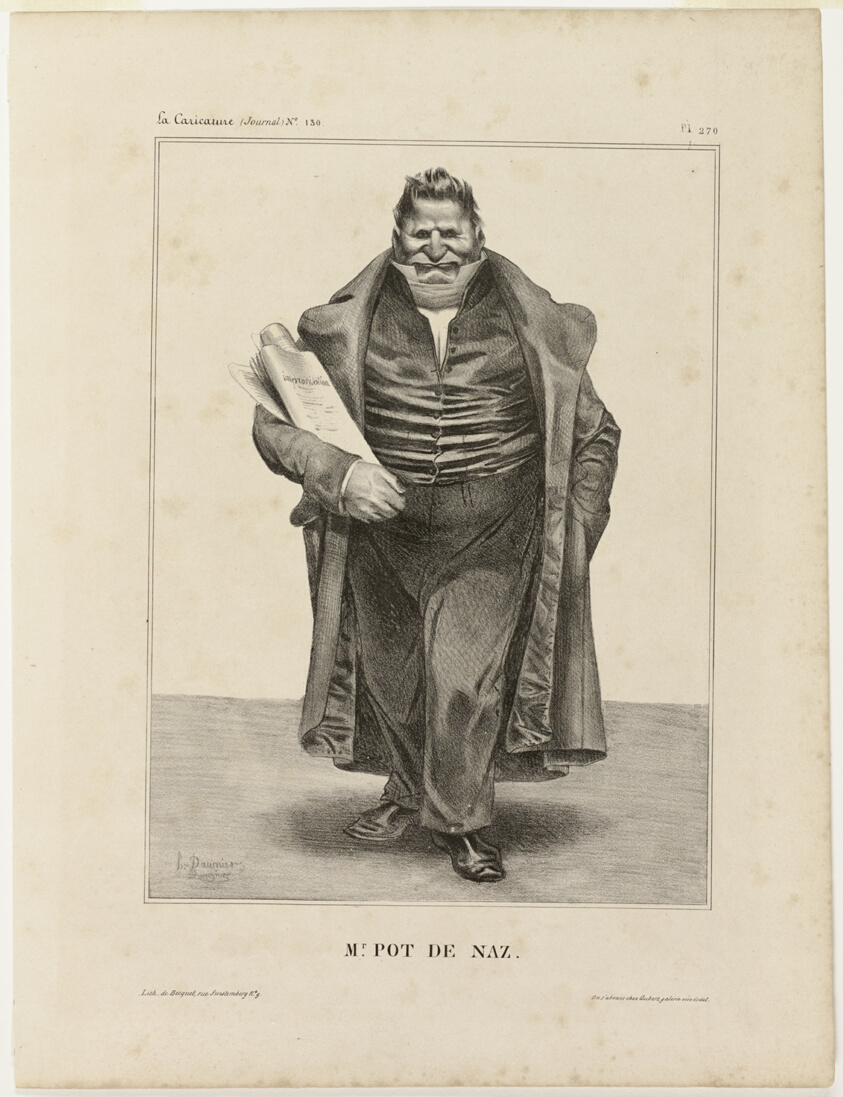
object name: Print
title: Mr. Pot De Naz.., plate 270 from Célébrités de la Caricature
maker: Honoré Victorin Daumier; French, 1808-1879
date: 1833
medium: Lithograph in black on white wove paper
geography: France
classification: lithograph; print; prints and drawing